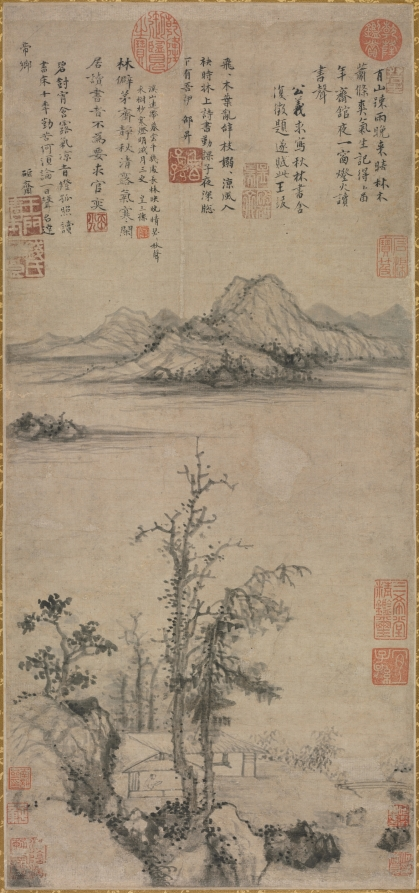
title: A Scholar's Retreat amid Autumn Trees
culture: China, Ming dynasty (1368–1644)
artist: Wang Fu (Chinese, 1362–1416)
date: c. 1403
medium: hanging scroll; ink on paper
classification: Painting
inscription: 青山疎雨晩來晴，林木蕭條爽氣生。/ 記得當年齋館夜，一窗燈火讀書聲。/ 公義求寫秋林書舍，復徵題，遂賦此。王紱 [印] 孟端; 友石生; 破研齋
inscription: 飛飛木葉亂辭枝，裊裊涼風入袂時。/ 床上詩書勤課子，夜深窗下有吾伊。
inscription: 林僻茅齋靜，秋清露氣寒。/ 閑居讀書者，不為要求官。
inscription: 碧樹宵含露氣涼，青燈孤照讀書床。/ 十年勤苦何須論，一日聲名達帝郷。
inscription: 溪山遠帶暮雲平，幾處長林映晩晴。/ 瑟瑟秋聲來樹杪，寒燈明滅月三更。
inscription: 5 seals of the Qianlong emperor (r. 1736-95); 1 seal of Tang Xun (dates unknown); 2 seals of He Zheng 何澂 (d. 1888); 3 seals of Cheng Qi 程琦 (1911–1988); 2 seals of Li Guochao 李國超 (20th century); 2 seals unidentified.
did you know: Wang Fu painted this going-away present and 3 friends added poems wishing the best for their departing friend Gongyi.